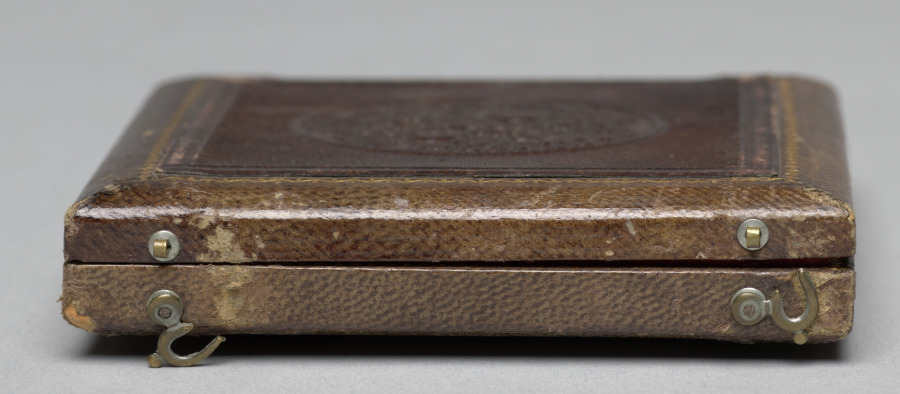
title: Hunter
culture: America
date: c. 1862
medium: daguerreotype, sixth plate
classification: Photograph